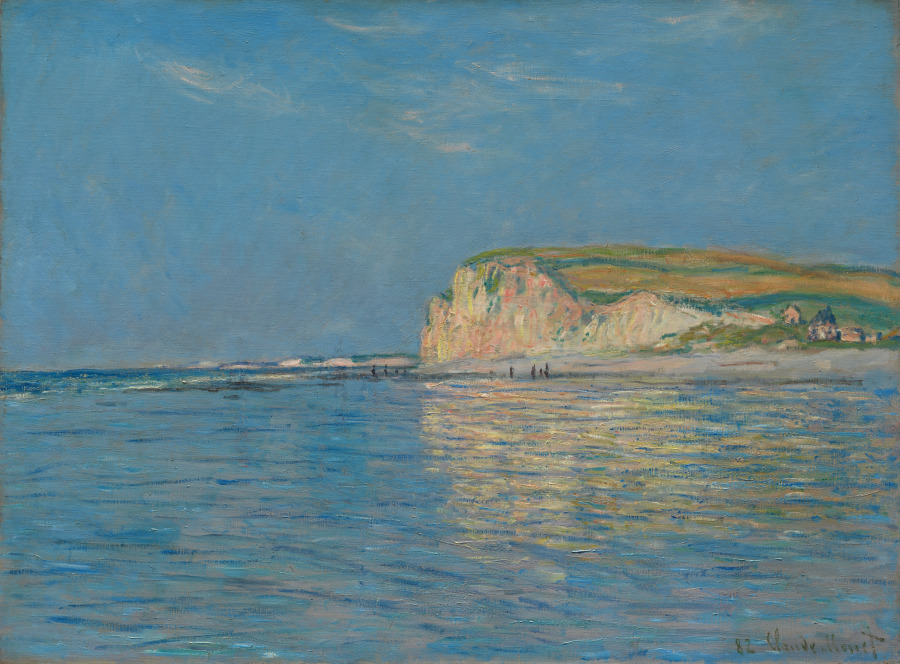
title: Low Tide at Pourville, near Dieppe, 1882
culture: France, 19th century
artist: Claude Monet (French, 1840–1926)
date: 1882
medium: oil on fabric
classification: Painting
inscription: Signed lower right: 82 Claude Monet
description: This is one of several views Claude Monet painted of Pourville, a fishing village on the north coast of France in Normandy. Pourville featured a boardwalk, a broad beach, and stunning cliffs. According to the artist's correspondence, the village was nothing special, but he was inspired by the landscape: "One could not be any closer to the sea than I am, on the pebbled beach itself and the waves beat at the foot of the house." During the spring of 1882 in Pourville, Monet stayed in a small hotel similar to the dwellings seen at the foot of the cliff to the right in this painting.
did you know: The narrow strokes of black paint along the the edge of the water at the base of the cliff indicate bathers.